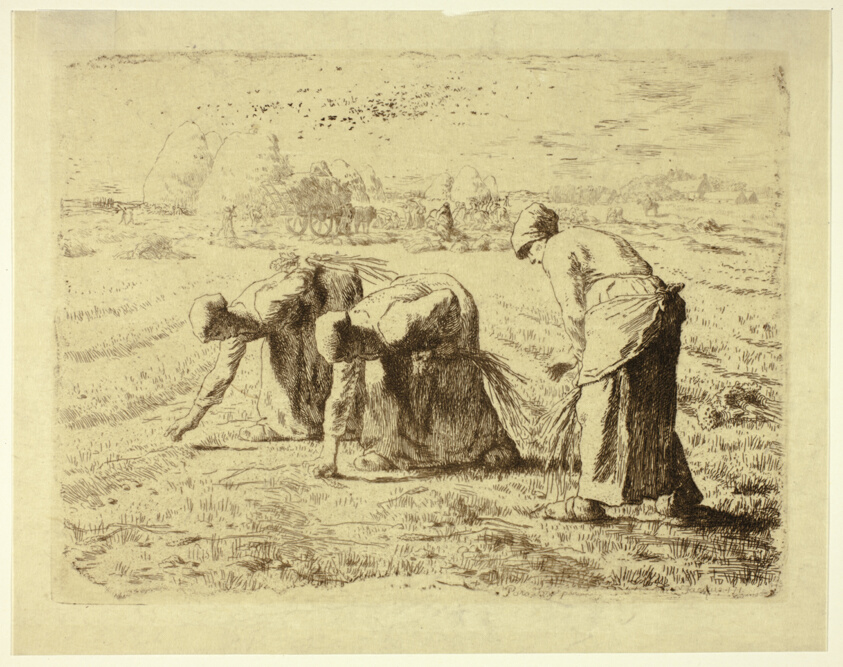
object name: Print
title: The Gleaners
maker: Jean François Millet (French, 1814-1875)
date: 1855–56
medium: Etching on paper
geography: France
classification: etching; print; prints and drawing